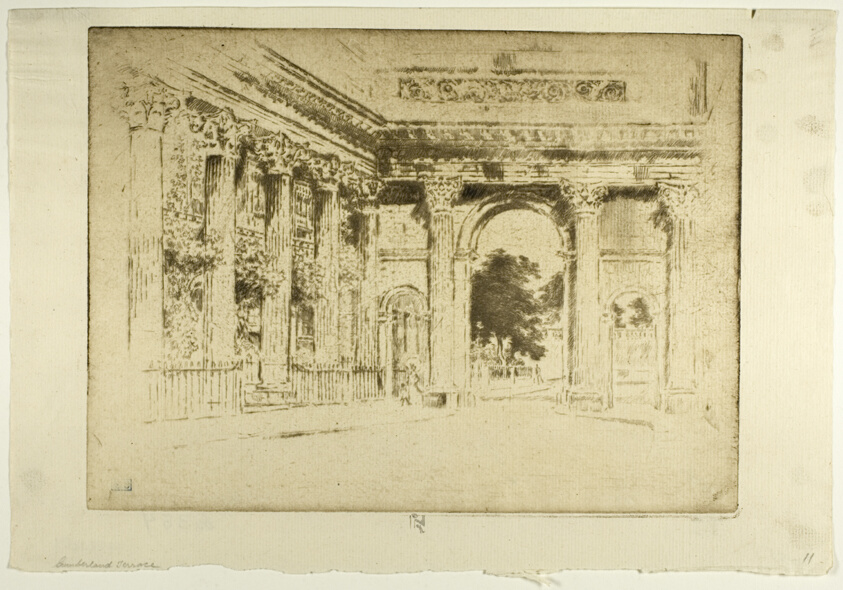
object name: Print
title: Cumberland Terrace, Regent's Park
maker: Joseph Pennell (American, 1857-1926)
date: 1905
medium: Etching on ivory laid paper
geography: United States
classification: etching; print; prints and drawing